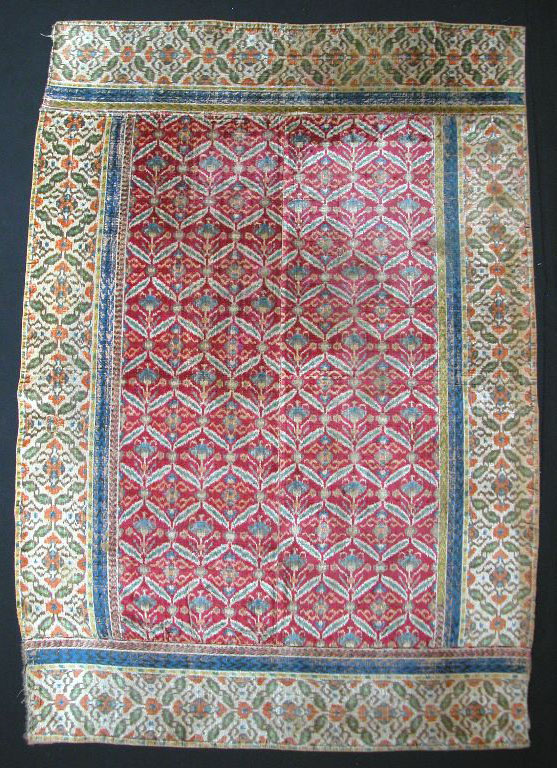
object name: Textile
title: Panel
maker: Turkey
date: 19th century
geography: Turkey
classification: textile; weaving - velvet